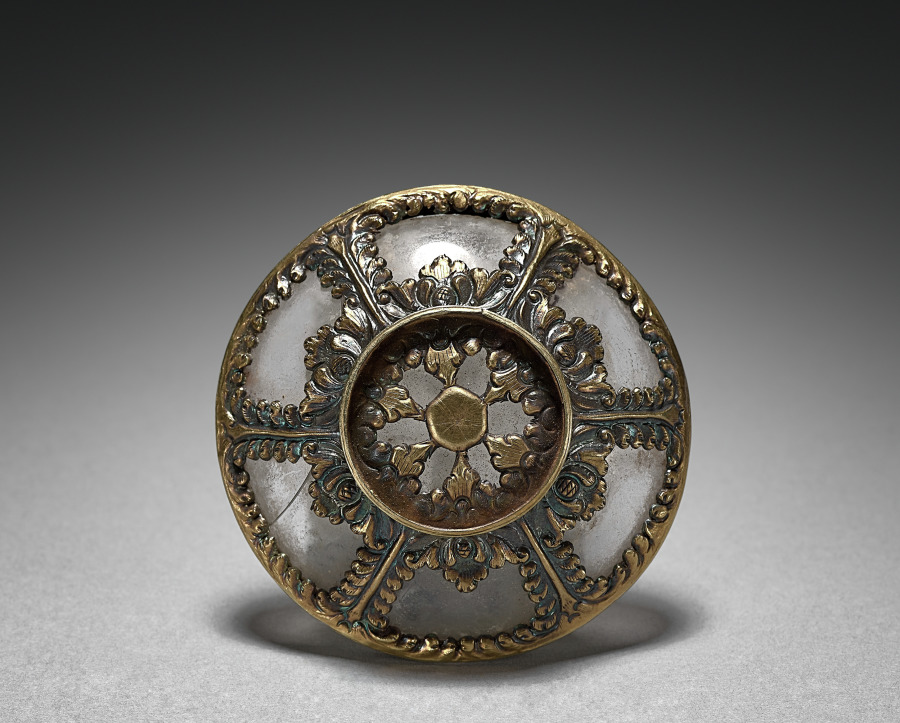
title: Box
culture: Java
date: 20th Century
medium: glass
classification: Glass